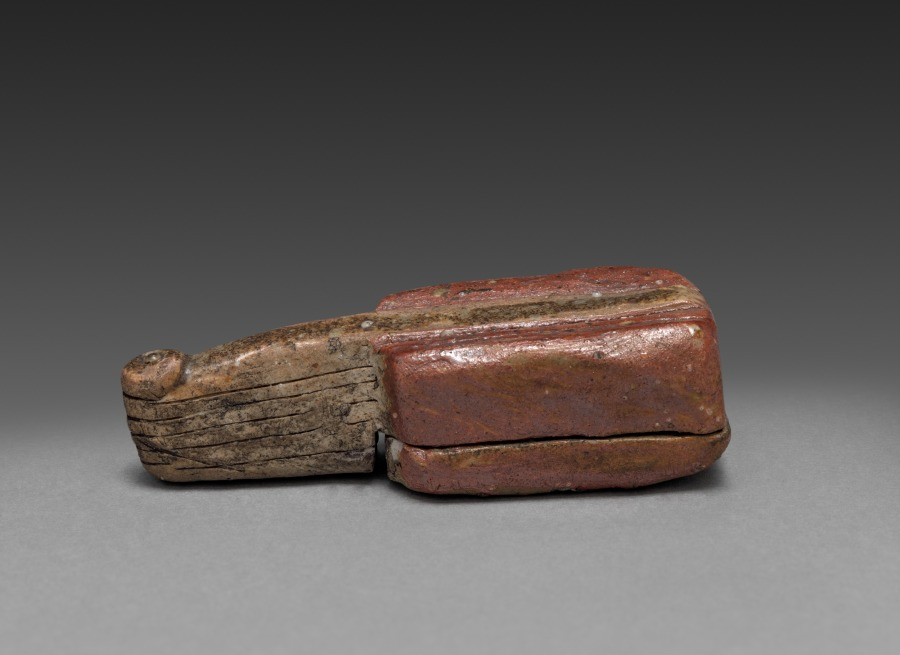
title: Ink Box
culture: Japan, Edo period (1615–1868)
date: early to mid-1800s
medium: pottery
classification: Ceramic